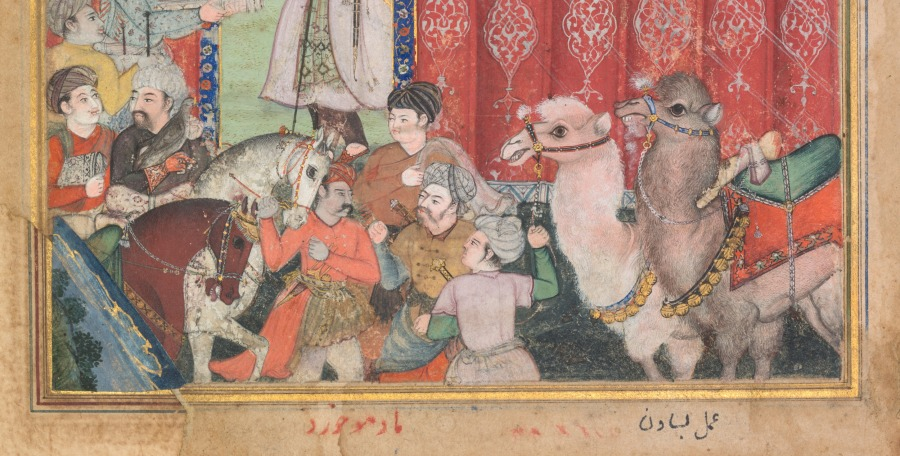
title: A feast for Babur hosted by his half-brother Jahangir Mirza in Ghazni in May 1505, from a Babur-nama (Memoirs of Babur)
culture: India, Mughal, 16th century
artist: Basavana (Indian, active c. 1560–1600)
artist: and Madhav Khurd (Indian, active late 1500s)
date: c. 1589; outer margins added c. mid-1900s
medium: Gum tempera and gold on paper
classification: Painting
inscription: verso: Persian text, in nasta‘liq script: . . . presented many gifts. In that year most of the rivers had become very swollen, to the extent that the Dih-i Ya‘qub River could not be forded. I brought the boat I had made at the lake and floated it in the waters of Dih-i Ya‘qub opposite Kamri and all the people crossed by boat. For this reason we went through the Sajavand pass and straight through crossing the river at Kamri by boat. We arrived at Kabul in the month of Dh’ul-Hijja [May 1505]. A few days earlier, Sayyid Yusuf Beyg had died of colic. At Kush Gunbad, Nasir Mirza had requested leave and remained behind to get provisions for his retinue from his own domain, saying he would follow in two or three days. Once he had left us he sent his entire army to the Nur valley on account of a minor act of disobedience by the people of the Nur valley. [Given] its rice fields and the location of its citadel on the peak of the mountain as . . .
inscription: recto: Persian inscription in bottom margin, in nasta‘liq script: the work of Basavana / [ . . . ] / Madhav Khurd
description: Twenty-one years before his conquest of Delhi, Babur took control of territories in Afghanistan, including the cities of Kabul and Ghazni. His half-brother, who controlled the region around Ghazni, ordered that a party be thrown in honor of Babur’s arrival from the north. Drinking parties and feasts in lavish movable tent settings, where gifts were exchanged, alliances forged, and relationships cemented, were as important to the building of the empire as the battles.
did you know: A manager directs servers to bring spoons and lay out the buffet table.